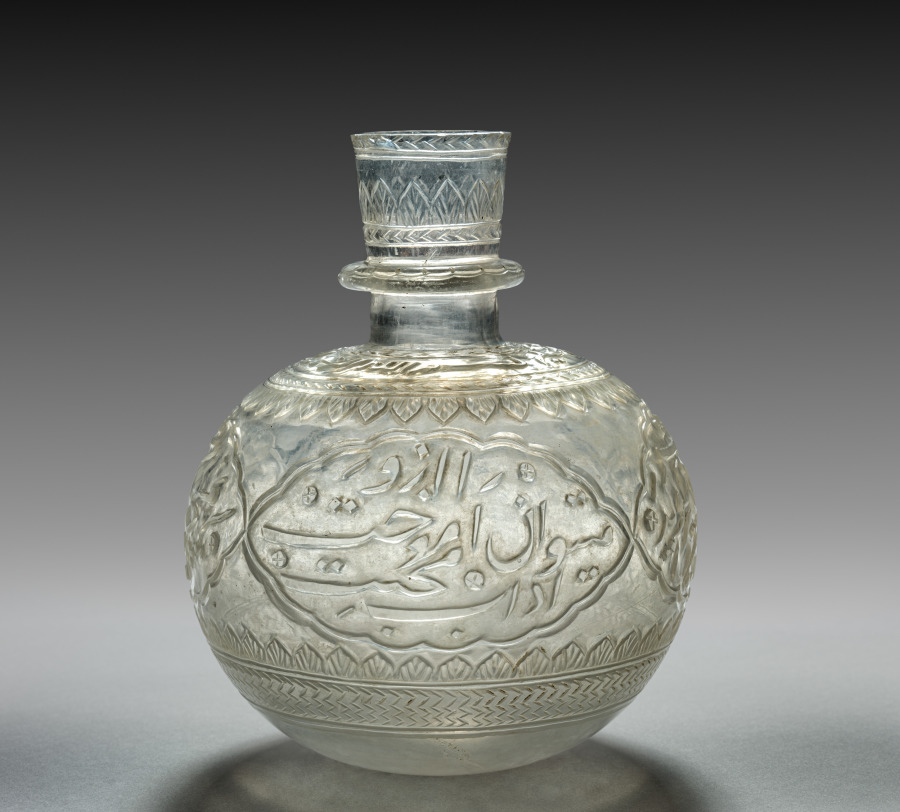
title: Hookah Bowl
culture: India, Mughal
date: 1700s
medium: glass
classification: Glass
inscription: Inscription in Farsi, on body: Even if live charcoal is placed on its head/ The hookah, a teacher of etiquette,/ will not respond unless drawn upon;/ Thus one can learn from its manners of refinement.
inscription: Inscription in Farsi, on shoulder: In the name of Allah the clement and merciful is the key to the wise treasure.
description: The inscription around the body of the base speaks to the use of the hookah in the decadent life of the Mughal court. The hookah is commended for being a proper, refined servant who will not “respond unless drawn upon” or, produce water bubbles when smoke is drawn through the hose. Undoubtedly the witty, poetic allusions would have been appreciated at banquets and other courtly gatherings. The use of wheel-cut glass for this hookah base may have been influenced by English glass and lead crystal that was exported to India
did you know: Around the top of this hookah bowl are incised the opening two lines from the Khamsa (Quintet) of the celebrated Persian poet Nizami (1141–1209).